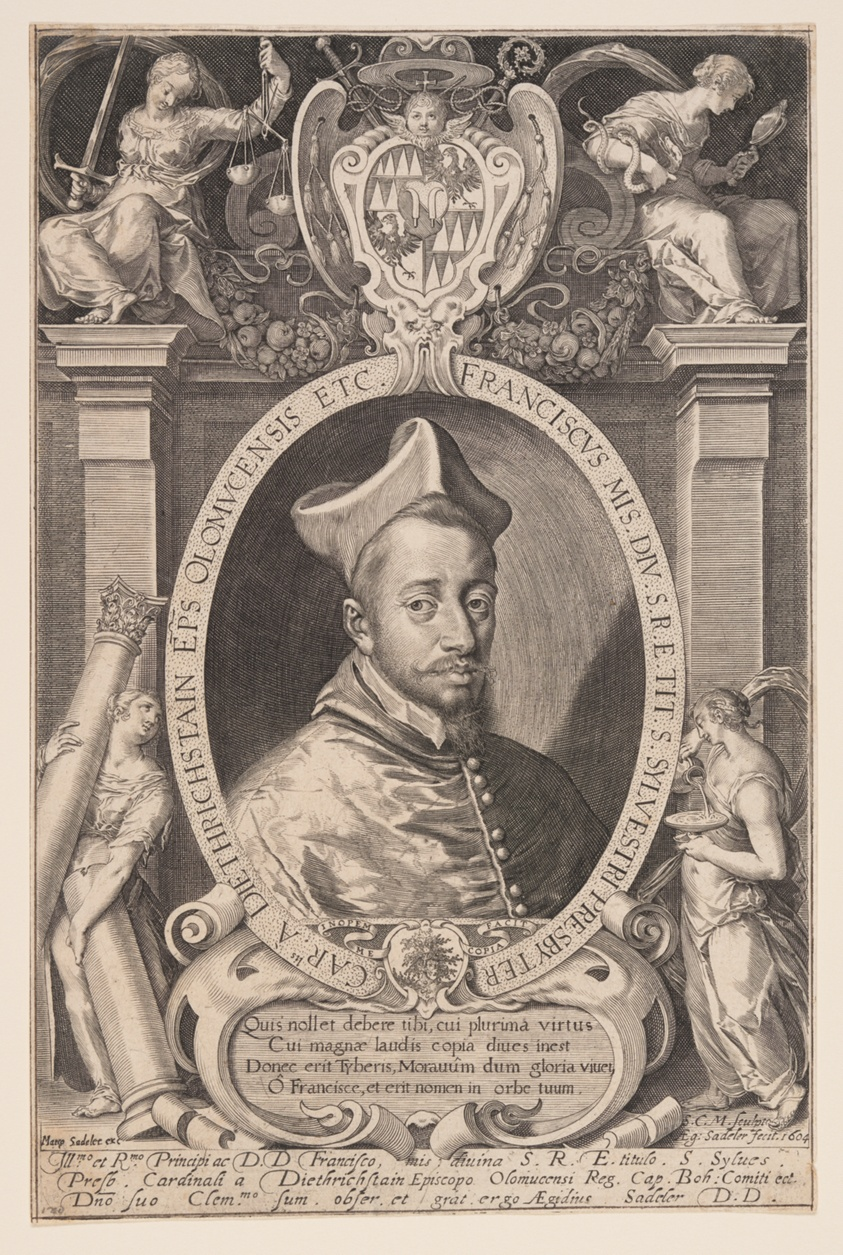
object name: Print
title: Franz von Dietrichstein, Bishop of Olmütz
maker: Aegidius Sadeler II; Flemish, c. 1570–1629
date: 1604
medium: Engraving on paper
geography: Flanders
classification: engraving; paper; print; prints and drawing